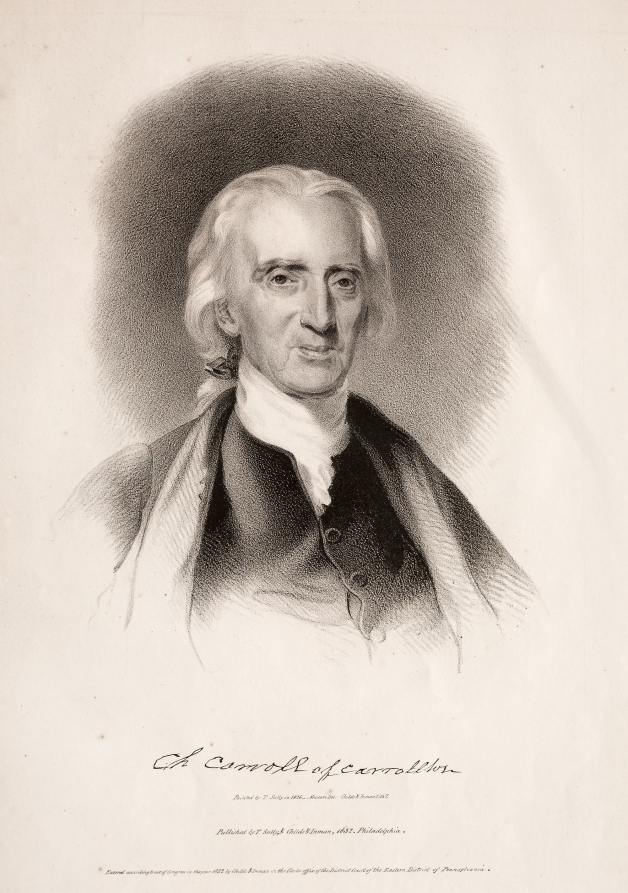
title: Charles Carroll of Carrollton, Maryland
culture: America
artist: Albert Newsam (American, 1809–1864)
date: 1832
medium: lithograph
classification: Print